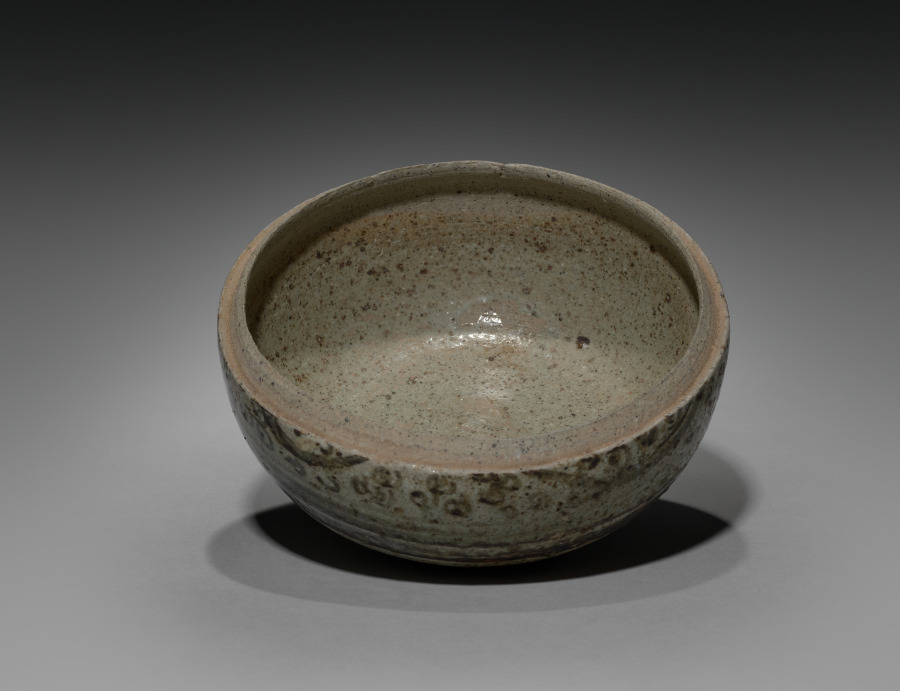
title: Covered Bowl with Painted Decoration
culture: Siam, Sawankhalok ware, 15th century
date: 1400s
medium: stoneware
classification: Ceramic